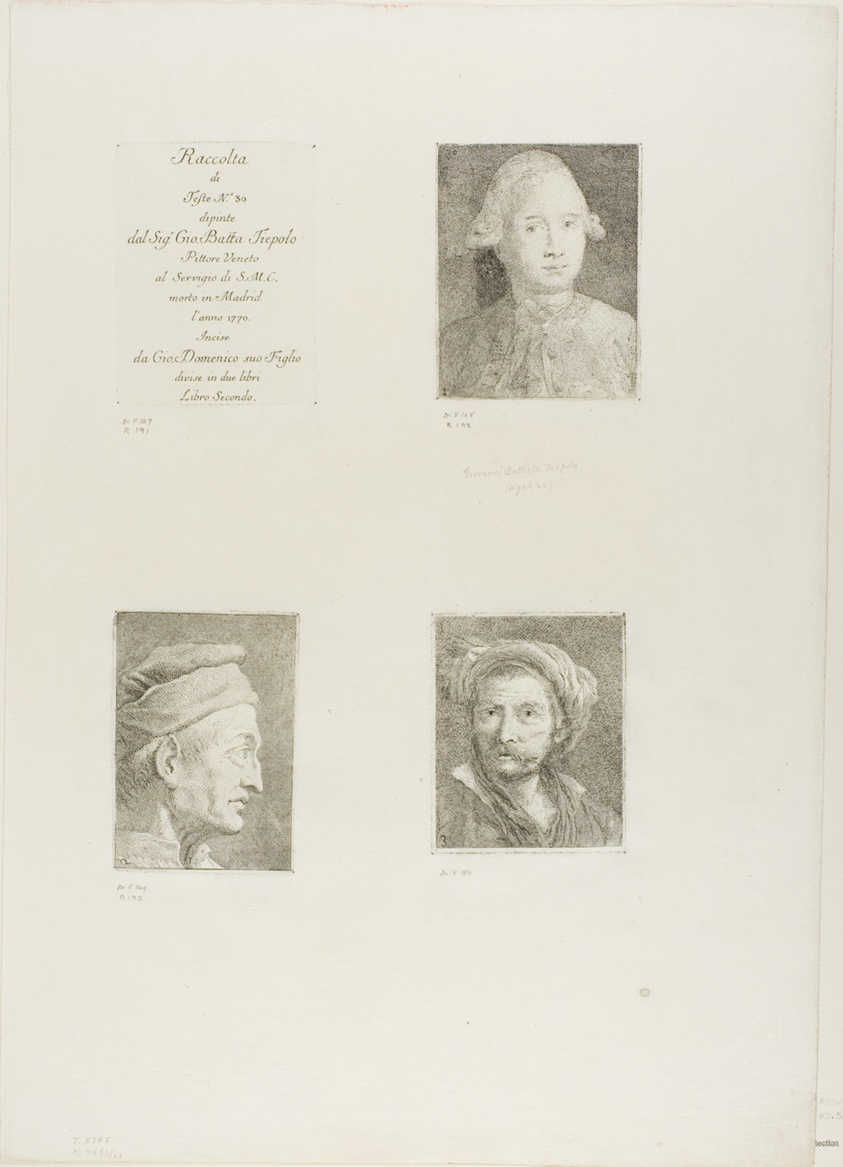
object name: Print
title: Title Page, Portrait of Giandomenico Tiepolo, Profile of an Old Man, and Old Man with a Turban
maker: Giovanni Domenico Tiepolo (Italian, 1727-1804)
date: 1775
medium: Four etchings on ivory laid paper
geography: Italy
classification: etching; print; prints and drawing